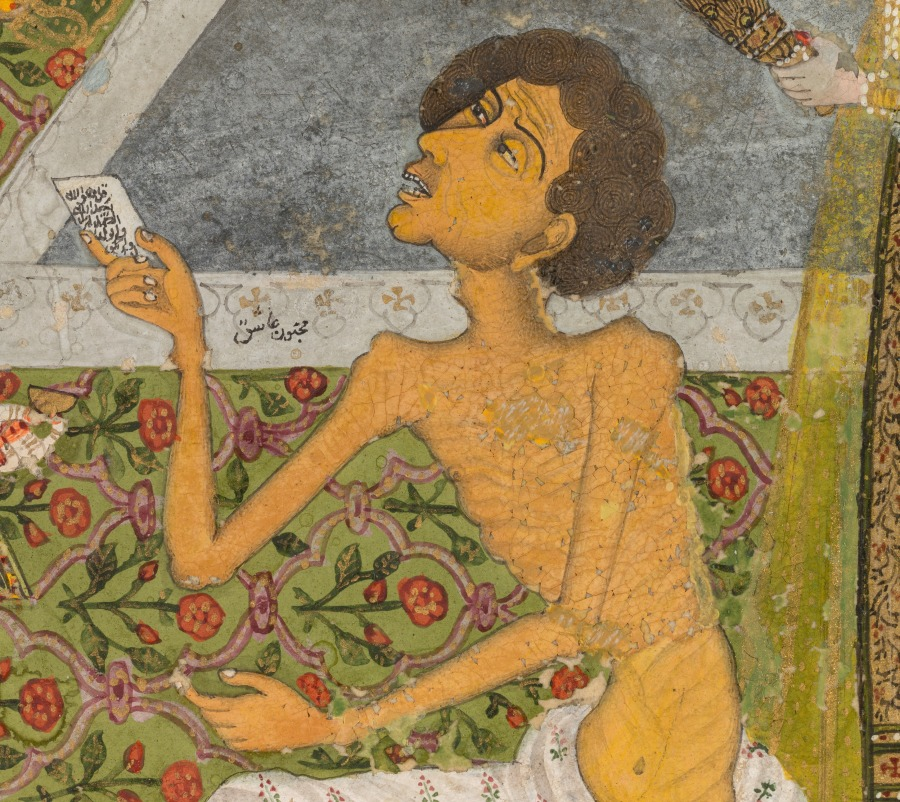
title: Lovers and beloveds: A composite of scenes from Persian, Urdu, and Sanskrit literature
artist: Chitarman II (Indian, c. 1680–с. 1750)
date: c. 1735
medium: Gum tempera and gold on paper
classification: Painting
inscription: Persian inscriptions throughout, in nasta‘liq script: Top left: The celebrated lover Ranjha; Top right, above awning: The notable ladies of the city falling into a swoon having caught sight of Joseph’s beauteous countenance; Top center, on pillar beneath canopy: The celebrated lover Vamiq; On another pillar, behind the woman’s head: The celebrated beloved ‘Azra; Upper left, on pillar: King Nala, the lover; Central figure with halo: The coming from the prison and sitting [in state] of the Lord Joseph the Prophet, with the women of the town cutting the palms of their hands and falling down unconscious; Left of center: [. . . cutting palms . . . wine cups fell from their hands . . . state of wonderment . . .]; Central pavilion at left: Sassi, the beloved the lover [Punnun]; Below central figure of Joseph: The stream of milk Shirin the beloved, weeping The death of Farhad, the lover; Lower right, in front of bearded man: Hafiz of Shiraz; Below his decanter: The stick of candy [referring to the woman with whom, according to popular lore, Hafiz was supposed to have fallen in love as a youth]; Behind the pavilion at right: Bride descending into a grave . . .; On the white railing to the left: Khwaja Bu Ali . . .; Bottom left: Queen Padmavati, the beloved, King Ratnasena, the lover; Bottom right: Majnun, the lover; On page held by Majnun: Say, “He is Allah, who is One, Allah the eternal refuge. He neither begets nor is born, Nor is there to Him any equivalent.” [Qur'an, chapter 112]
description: The figure of Joseph, identified by his halo, sits in the center near the top of this painting of heroes and heroines of ten different Persian, Urdu, and Sanskrit romances. The depicted scene occurs after Joseph has been purchased by Zulaykha in Egypt. Zulaykha, wishing to show him off to her friends and acquaintances, invites them to her home where she supplies oranges and knives. When the women see Joseph, they all are so distracted by his divine beauty that they accidentally cut their hands while peeling their oranges, but remain mesmerized by his appearance. The dramatic scene in the center is from the Persian romance of Khusrau and Shirin, in which Farhad, a stonecutter who loved Shirin, threw himself to his death from a mountaintop after hearing news of Shirin’s death, falsely sent to him from his rival Khusrau. The emaciated Majnun is in the lower right corner. Every vignette has been identified with a tiny Persian inscription.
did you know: Below the bearded poet Hafiz is the woman he loved; her name was Stick of Candy.